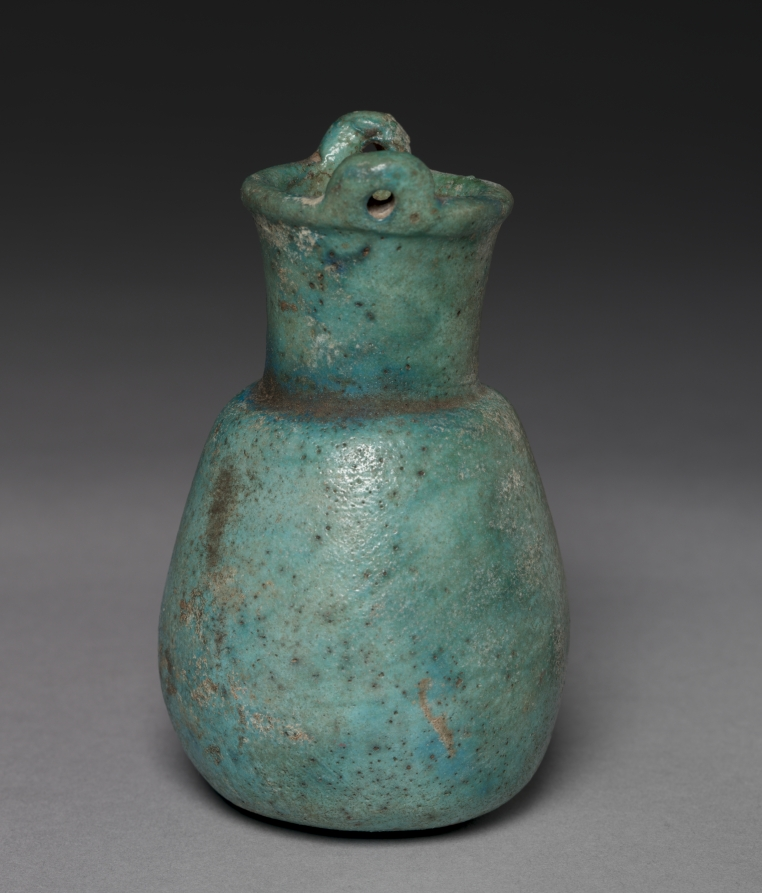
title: Situla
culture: Egypt, Late period (715–332 BCE)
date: 715–332 BCE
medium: turquoise faience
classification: Vessels